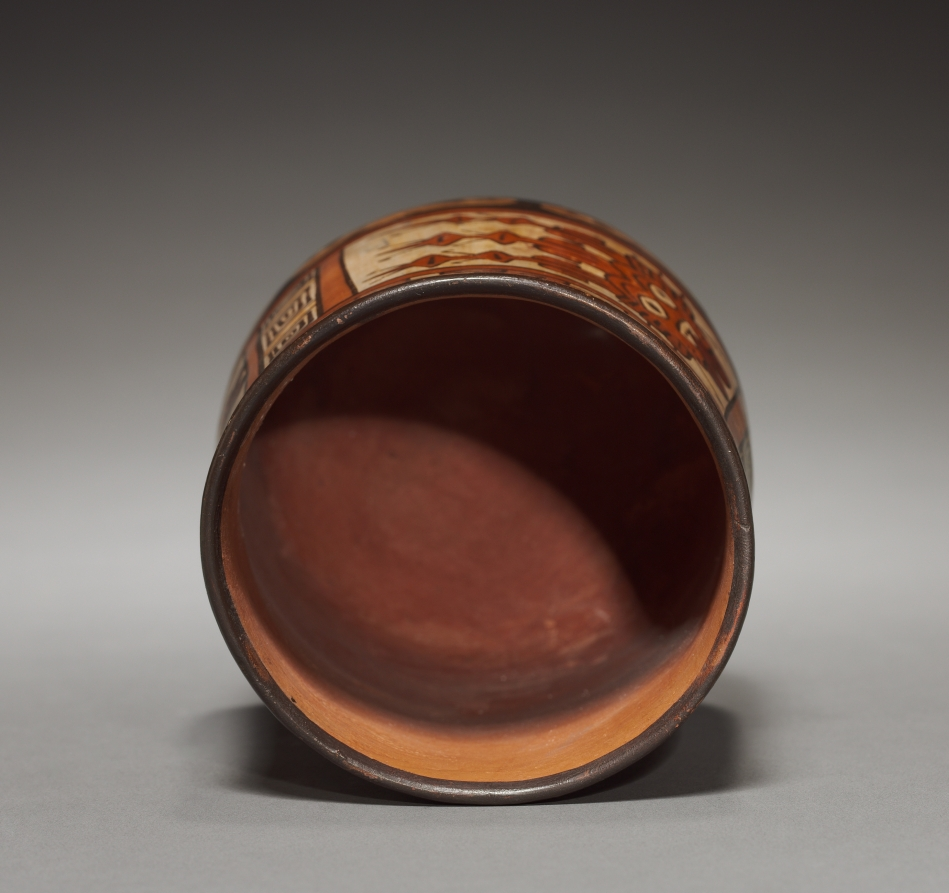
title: Vessel with Female Faces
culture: Peru, South Coast, Nasca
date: 100 BCE–700 CE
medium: earthenware with colored slips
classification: Ceramic